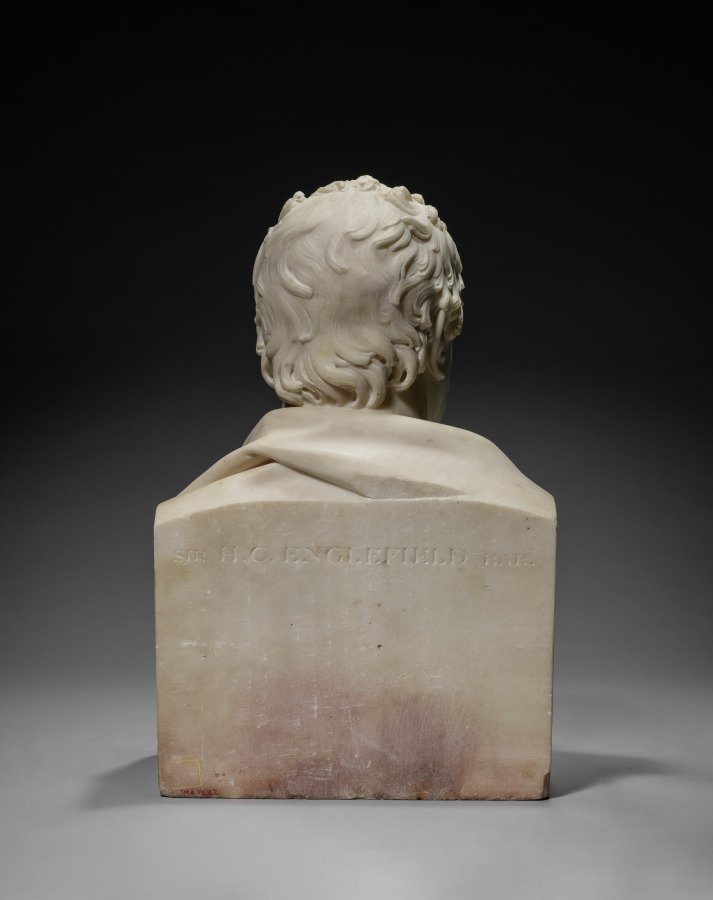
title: Sir H. C. Englefield, Bart.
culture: England, 19th century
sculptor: Francis Legatt Chantrey (British, 1781–1841)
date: 1818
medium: marble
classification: Sculpture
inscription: inscribed left side: Chantrey/Sculptor/1818; rear: Sir H. C. Englefield, Bart.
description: To modern eyes, a bare-chested portrait of a man in his mid-60s might seem undignified. However, it was fashionable for gentlemen of Englefield’s generation to be portrayed in this manner, deliberately referencing the antique sculptures of Roman statesmen they admired. As a Catholic, Englefield was barred from taking part in politics in England; however, he was a member of several clubs devoted to the amateur study of art, science, and history. Among these were the Society of Dilettanti, which championed the works of antiquity and promoted the creation of modern art in the same spirit—like this marble bust by celebrated sculptor Francis Legatt Chantrey.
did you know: Initially, Chantrey tried to establish himself as a portrait painter. After 1805, he painted only on occasion and from 1811–20, he became the leading portrait sculptor in Regency Era Great Britain.